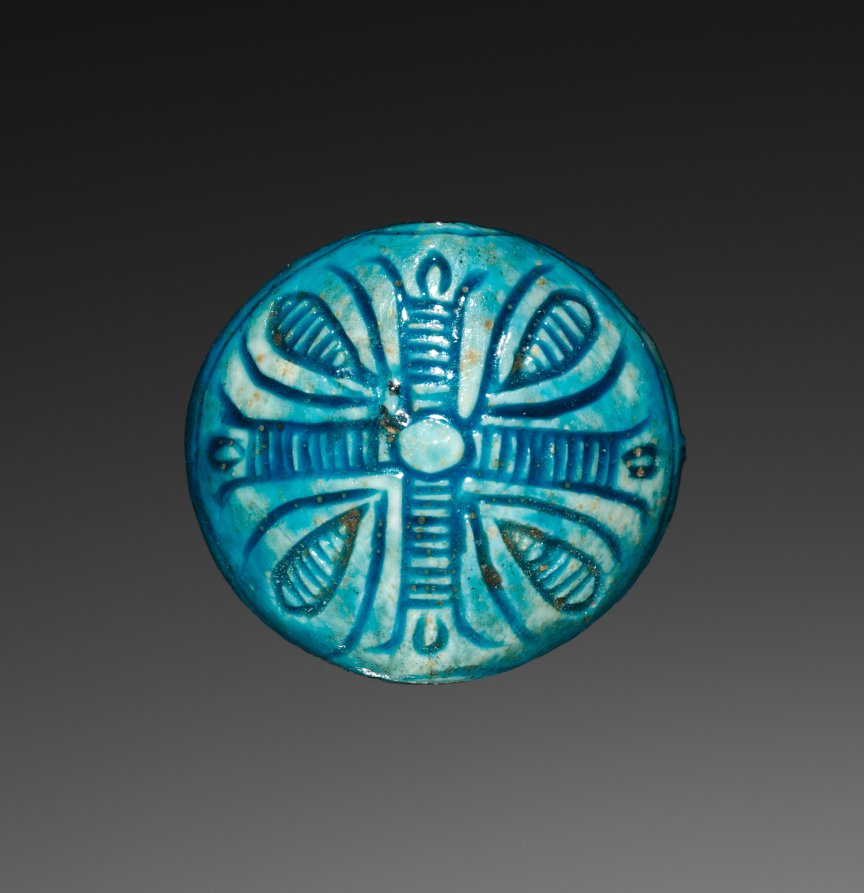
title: Scaraboid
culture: Egypt, Middle Kingdom (2040–1648 BCE)–Second Intermediate period (1648–1540 BCE)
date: 1980–1540 BCE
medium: turquoise-glazed steatite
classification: Seals